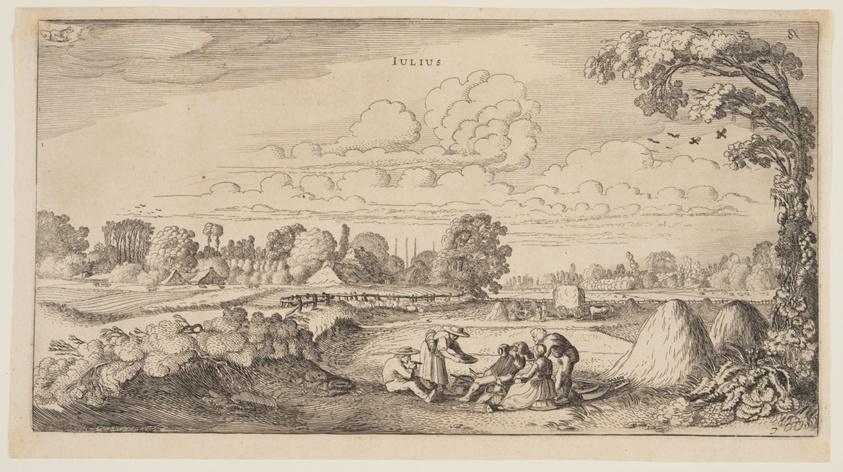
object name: Print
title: July, from The Twelve Months of the Year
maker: Jan van de Velde II (Dutch, c. 1593–1641); after Willem Buytewech (Dutch, c. 1591–1624)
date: 1616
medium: Etching on ivory laid paper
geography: Netherlands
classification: etching; paper; print; prints and drawing